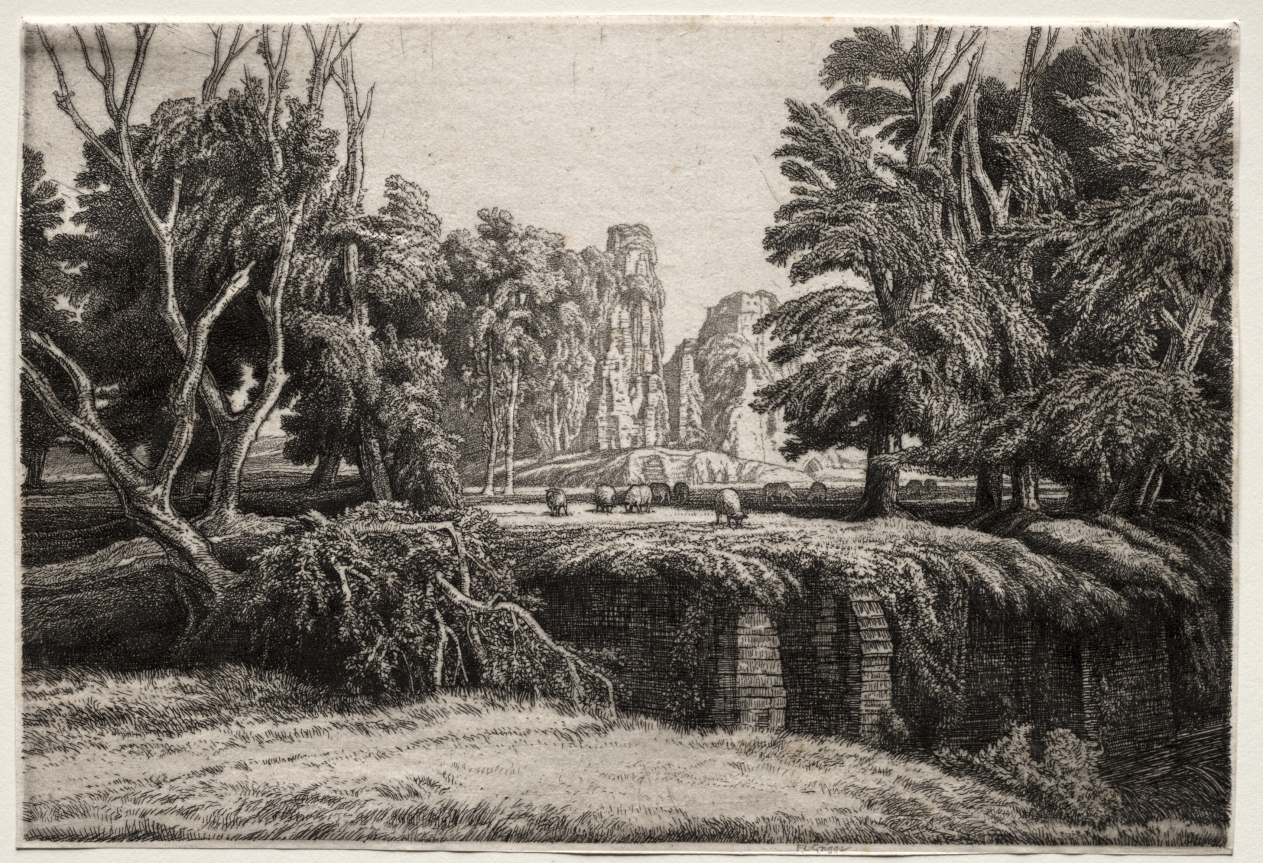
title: Launds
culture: England, 20th century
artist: Frederick Landseer Maur Griggs (British, 1876–1938)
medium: etching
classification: Print